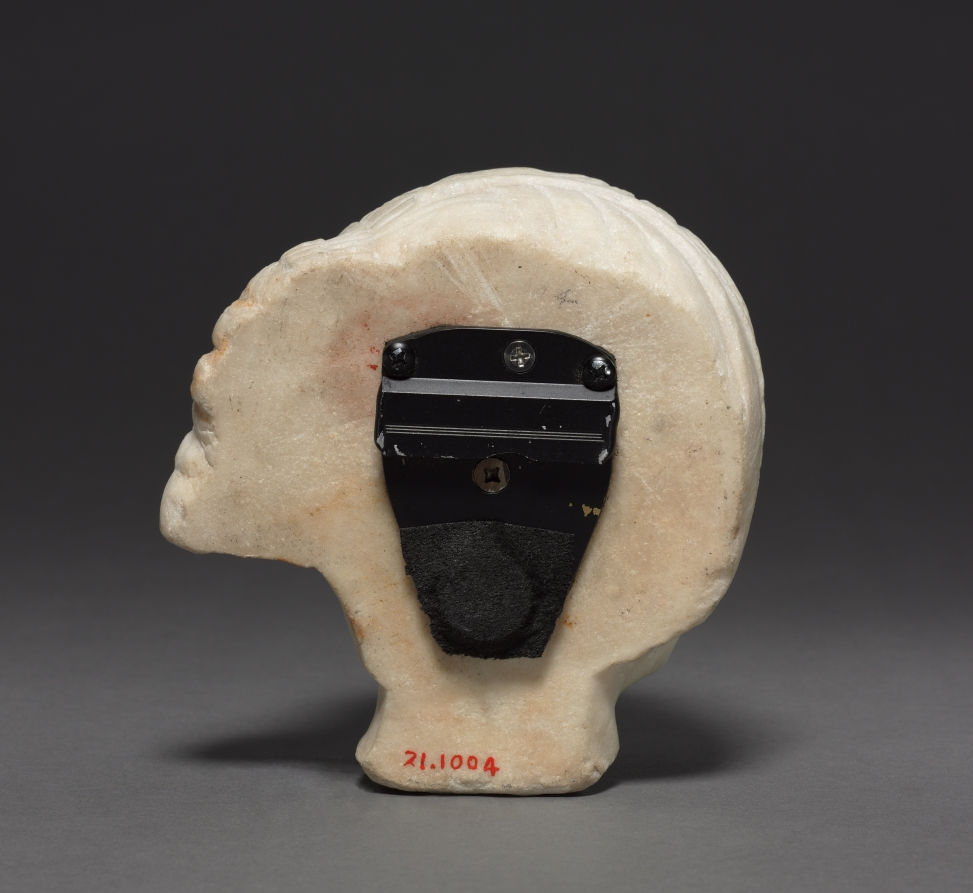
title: Head of a Woman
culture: France, 15th century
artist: circle of Michel Colombe (French, c. 1430–c. 1513)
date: c. 1500–1525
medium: marble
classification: Sculpture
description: The original context and function of these two marble heads are unknown. They are presumed to have been part of a relief sculpture from a château, perhaps in the Loire region, or else from a tomb sculpture. Their style is reminiscent of sculptures produced by Michel Colombe, a prominent sculptor active in the Loire Valley in the service of aristocratic and royal patrons, and may have been carved by a close follower or member of his workshop.